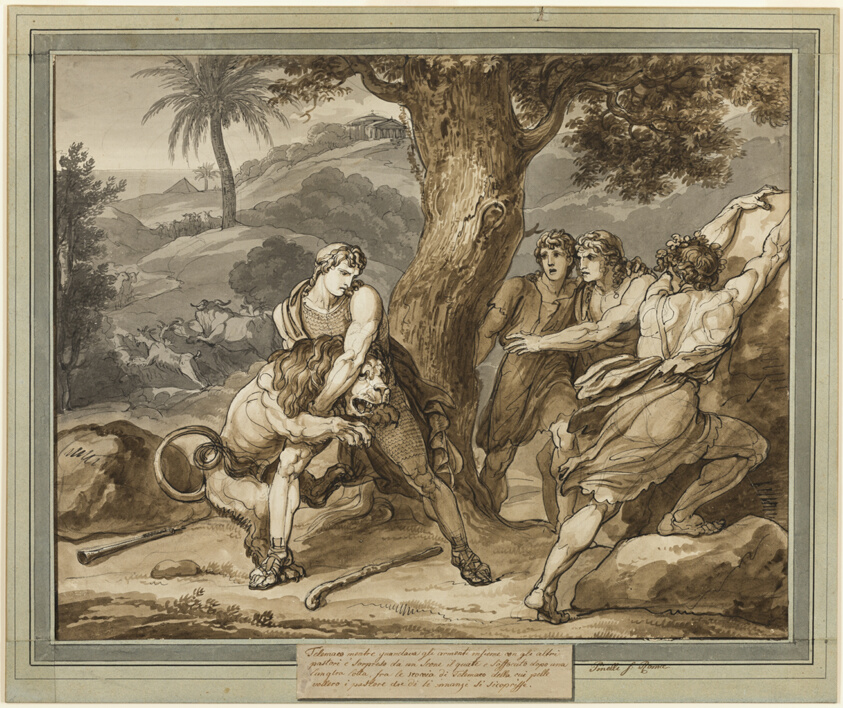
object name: Drawing and Watercolor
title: Telemachus Battles the Lion, from The Adventures of Telemachus, Book 2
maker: Bartolomeo Pinelli (Italian, 1781-1835)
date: 1808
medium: Pen and black ink, with brush and brown and gray wash, over traces of black chalk on ivory laid paper, laid down on board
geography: Italy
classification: drawings (visual works); prints and drawing